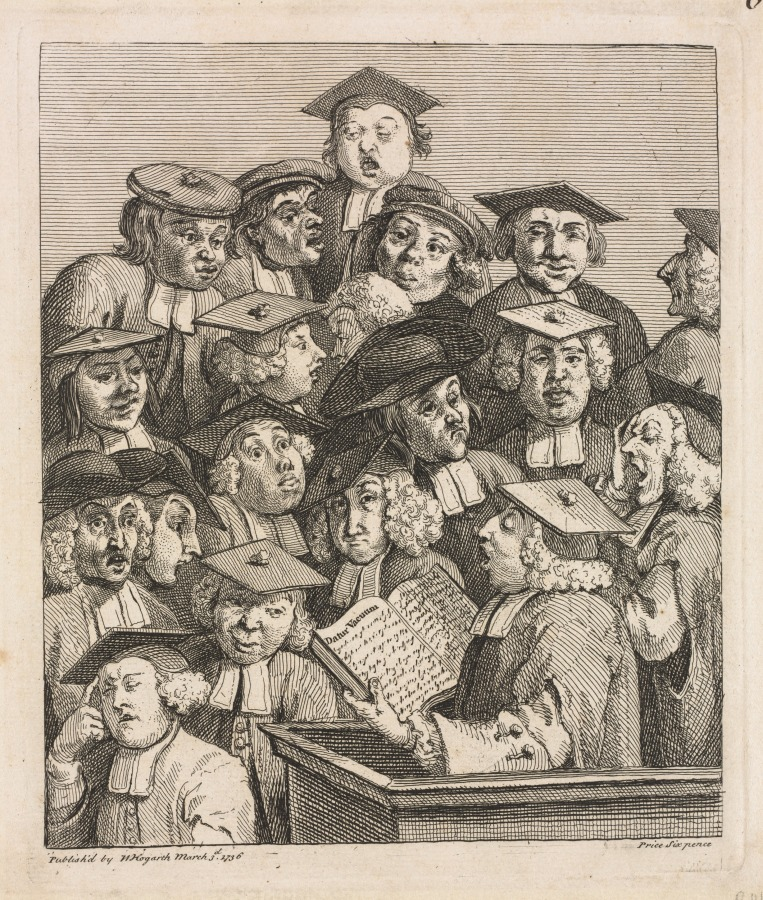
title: Scholars at a Lecture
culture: England, 18th century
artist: William Hogarth (British, 1697–1764)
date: 1736–37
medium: etching and engraving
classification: Print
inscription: upper right margin, in pen and brown ink: 62 in plate, lower left, below image: Publish'd by W. Hogarth March 3d